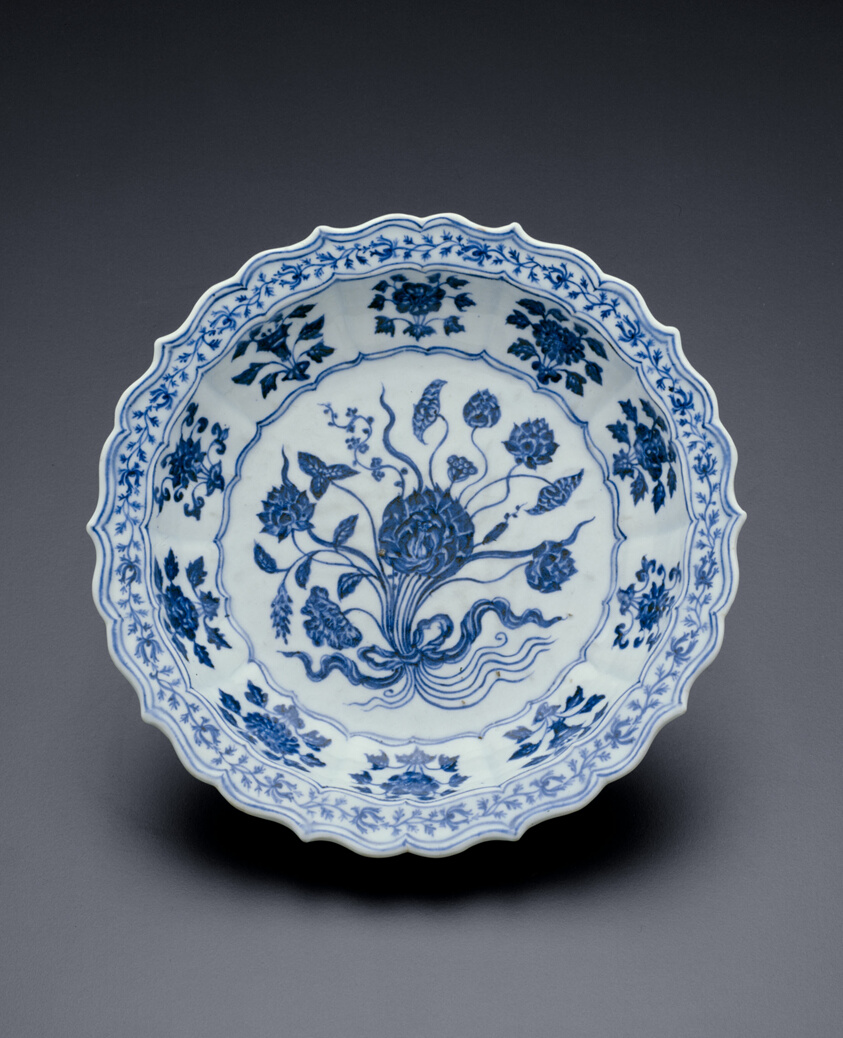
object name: Vessel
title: Lobed Dish with Bouquet of Lotus and Saggitaria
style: Chinese (culture or style)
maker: China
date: Ming dynasty (1368–1644), Xuande reign mark and period (1426–1435)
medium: Porcelain painted in underglaze blue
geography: China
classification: dish (vessel); porcelain; ceramics; asian art; vessel